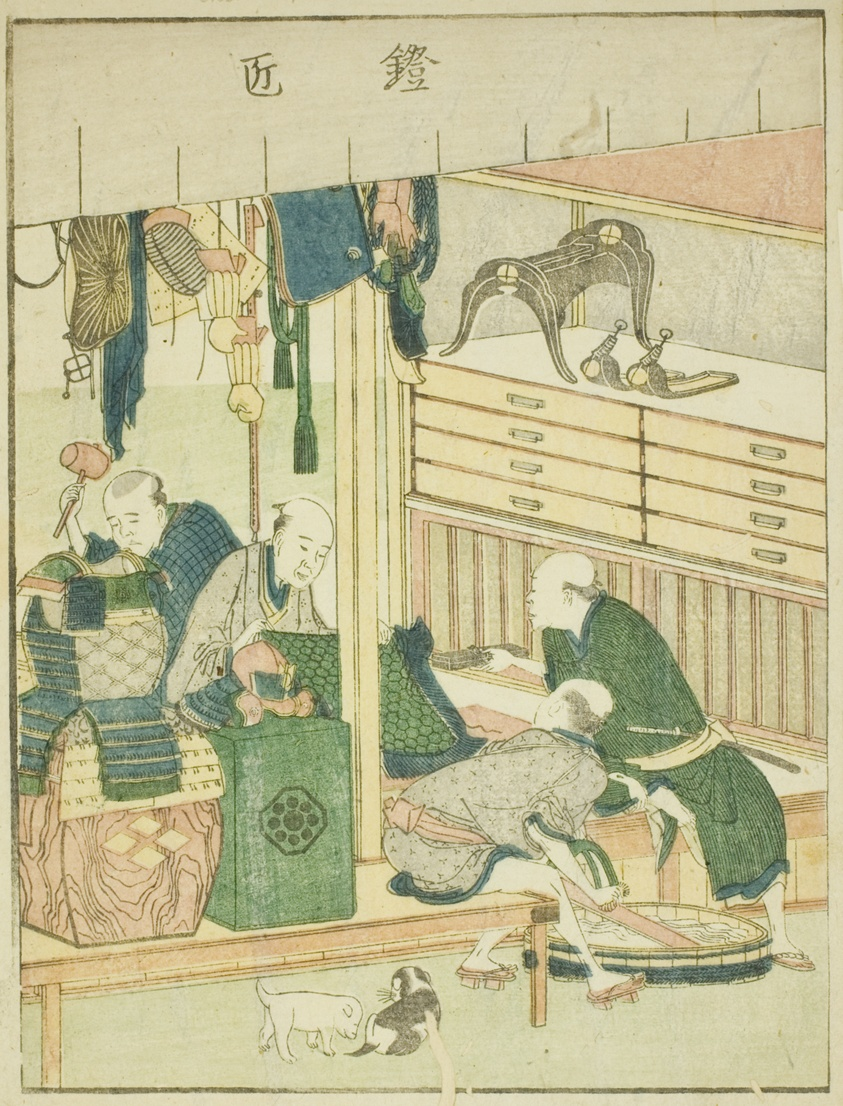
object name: Print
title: Armorer (Yoroi takumi), from the illustrated book "Picture Book of the Amusements of the East (Ehon Azuma asobi)"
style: Japanese (culture or style)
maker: Katsushika Hokusai 葛飾 北斎; Japanese, 1760-1849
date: c. 1802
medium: Color woodblock print; page from illustrated book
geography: Japan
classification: woodblock print; print; asian art